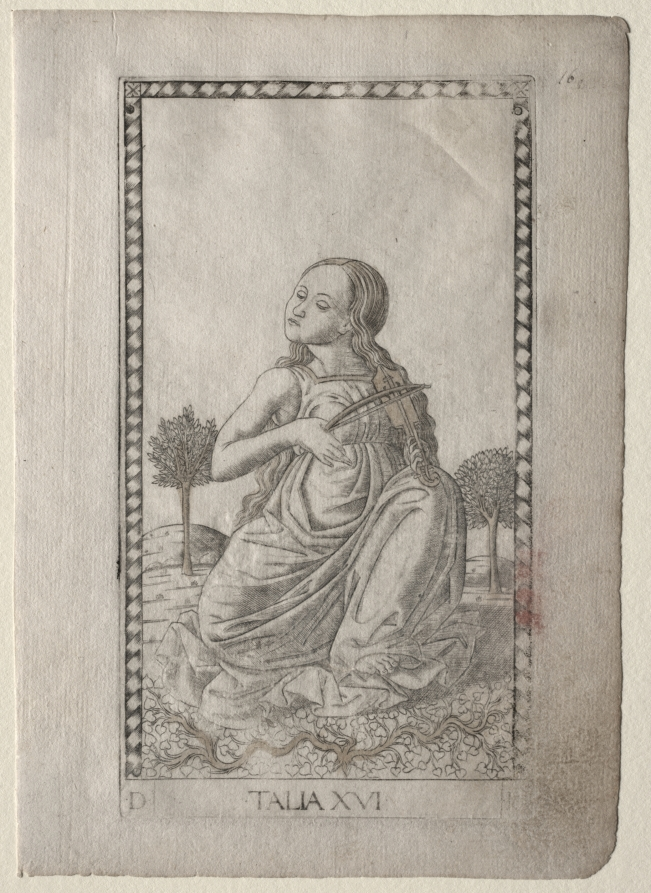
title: Thalia (comedy, pastoral poetry) (from the Tarocchi series D: Apollo and the Muses, #16)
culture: Italy, Ferrara, 15th century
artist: Master of the E-Series Tarocchi (Italian, active 1460s)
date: before 1467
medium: engraving hand-colored with gold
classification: Print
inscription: Lettered below the image of Talia (Thalia): ·D· / ·TALIA·XVI· / [16]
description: This engraving is part of the Tarocchi group marked with the letter “D,” and named Apollo and the Muses. In Greek mythology, the nine Muses (Calliope, Urania, Terpsichore, Erato, Polyhymnia, Thalia, Melpomene, Euterpe, and Clio) were the daughters of Zeus, king of the gods, and Mnemosyne, the Titaness of memory. The Muses were goddesses presiding over different branches of the arts and sciences. Their leader and supervisor was Apollo, the god of light, music, prophecy, and poetry. Here, Talia (Thalia) is personified as a female figure, in profile to left, seated on ivy, and set an imaginary landscape. She is playing a viola. Thalia was regarded as the Muse of comedy.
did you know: Thalia is the only Muse in the Tarocchi series that is not represented with a celestial disk. Indeed, Thalia was believed to be a bucolic Muse, thus related to earth.